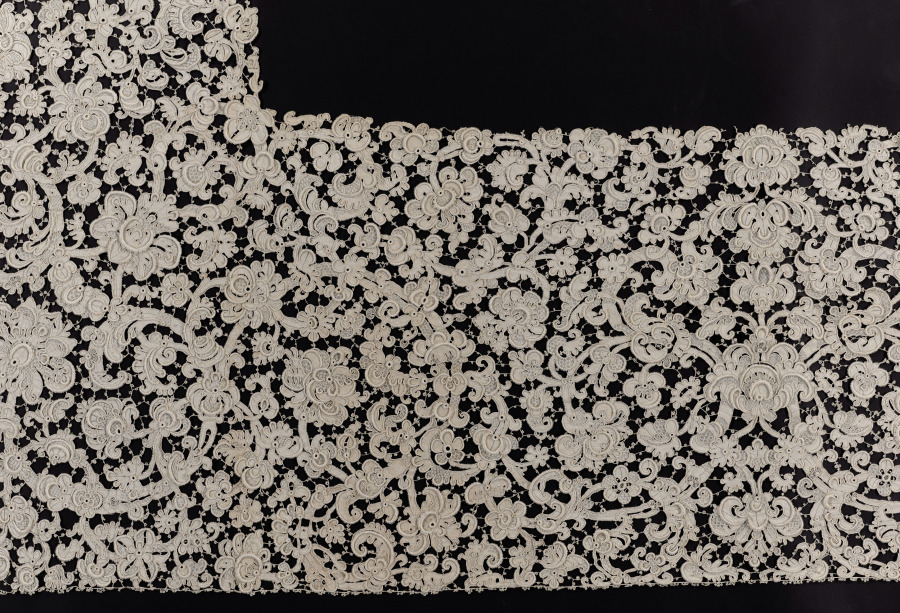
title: Lace Bed Cover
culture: Italy, Venice, 1660-1699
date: 1660–1699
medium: Needle lace (Venetian Raised Point)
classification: Lace